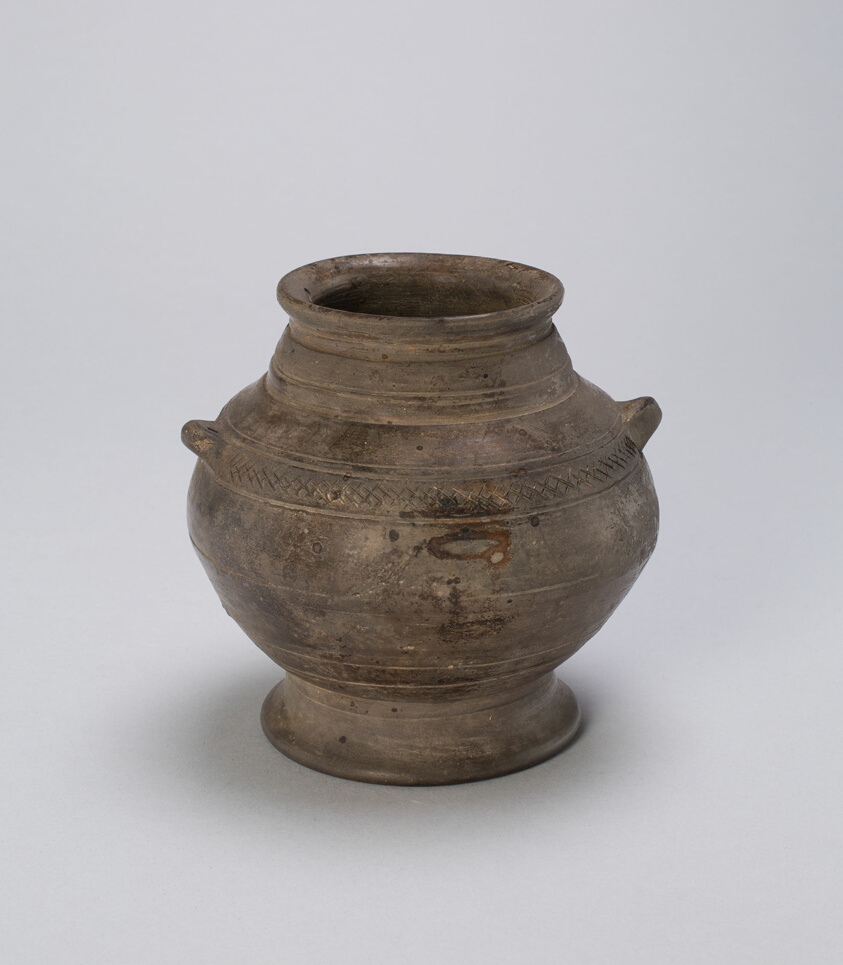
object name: Vessel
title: Jar with Grooved Bands and Loop Handles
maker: China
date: Shang dynasty (c. 1600–c. 1050 B.C.), 12th–11th century B.C.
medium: Earthenware with molded and incised decoration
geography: China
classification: ceramics; asian art; vessel